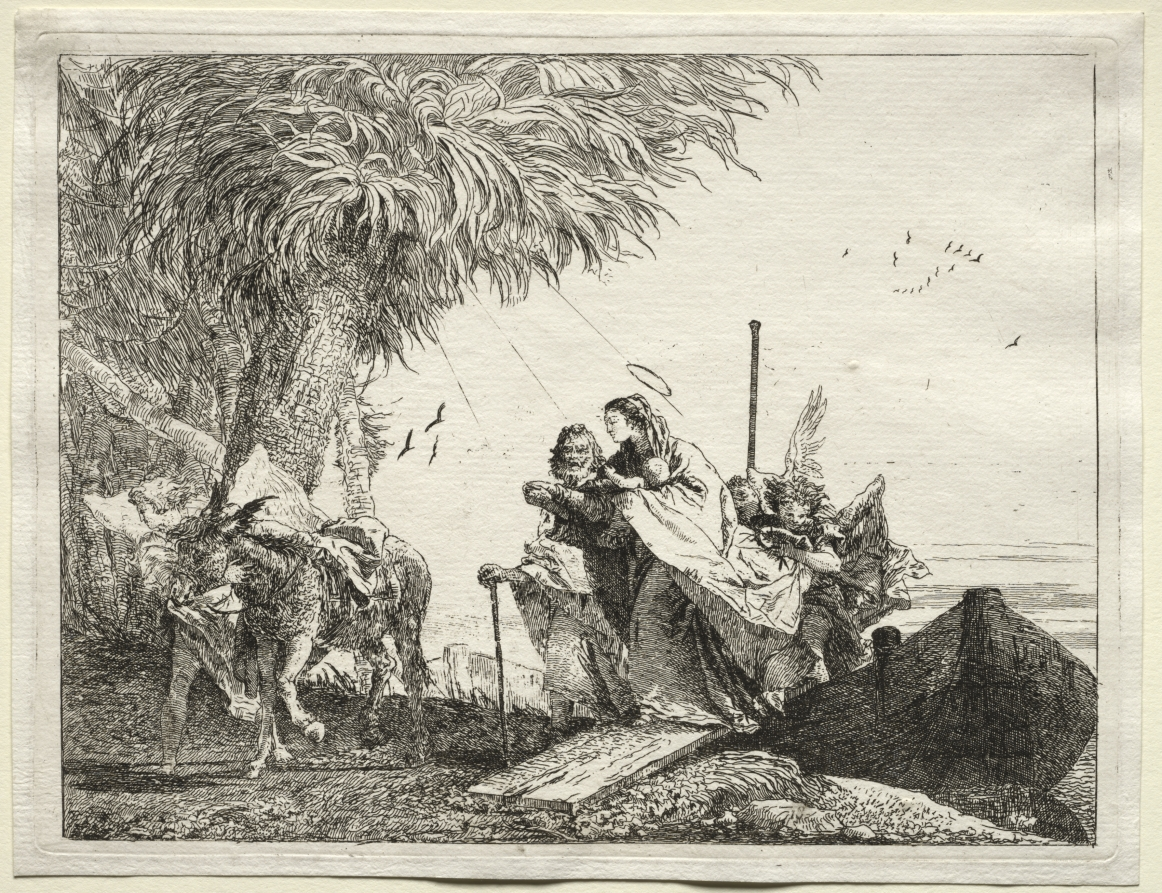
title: Flight into Egypt: The Holy Family, Disembarking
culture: Italy, 18th century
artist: Giovanni Domenico Tiepolo (Italian, 1727–1804)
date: 1750–53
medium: etching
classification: Print